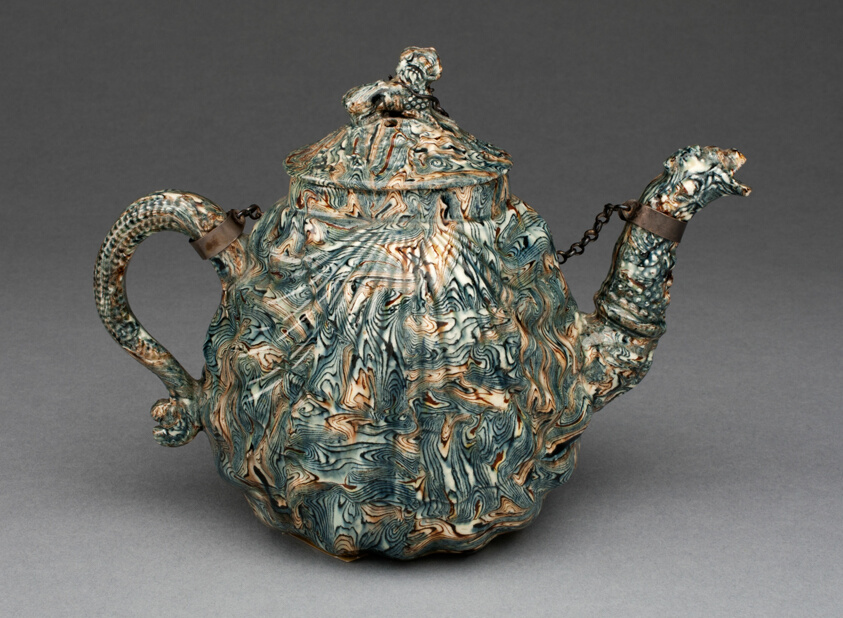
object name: Ceramics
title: Teapot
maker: Staffordshire, England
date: 1750–59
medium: Lead-glazed earthenware (agateware)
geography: Staffordshire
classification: teapot; european decorative arts; agateware; ceramics; earthenware; lead-glazed earthenware